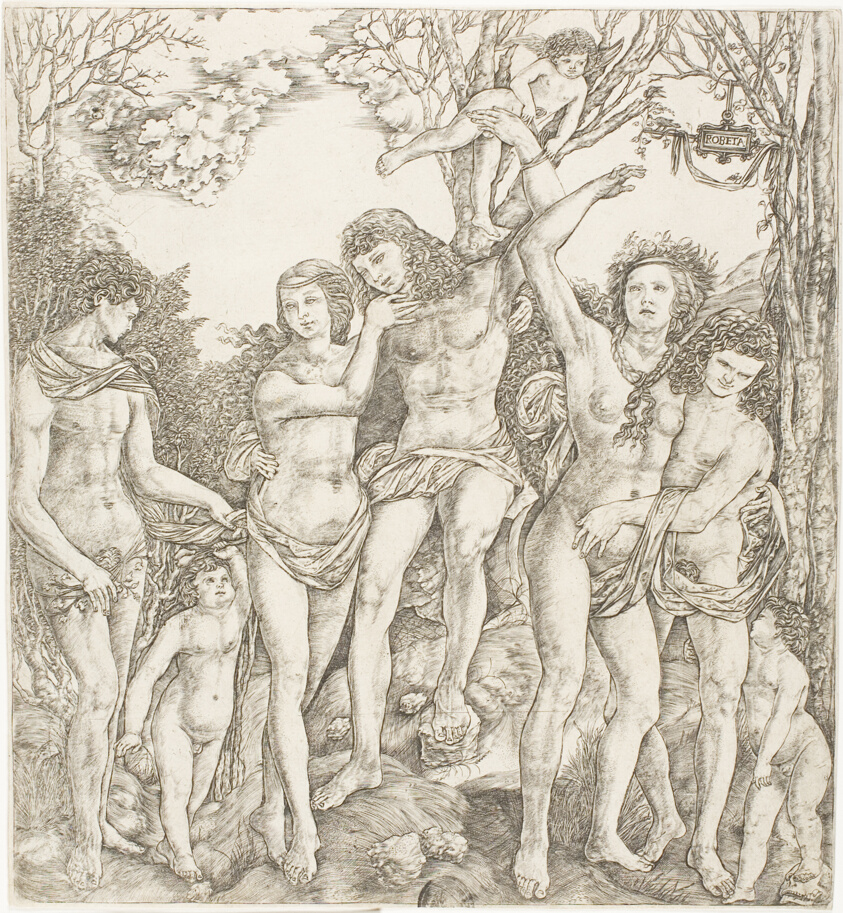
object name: Print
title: Allegory of Carnal Love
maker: Cristofano Robetta (Italian, 1462-c.1535)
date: c. 1530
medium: Engraving on ivory laid paper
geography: Italy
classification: engraving; print; prints and drawing